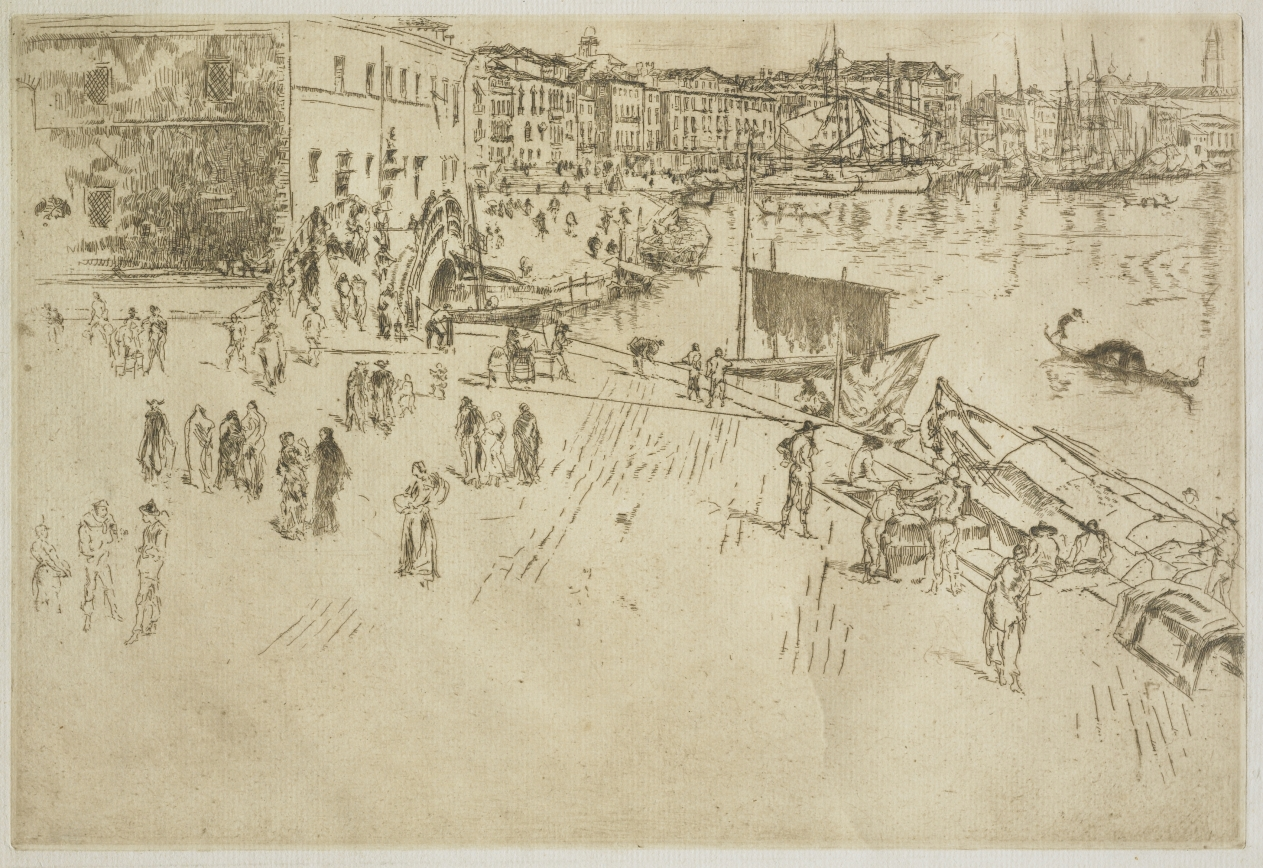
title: The Riva, No. 1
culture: America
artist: James McNeill Whistler (American, 1834–1903)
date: 1880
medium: etching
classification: Print